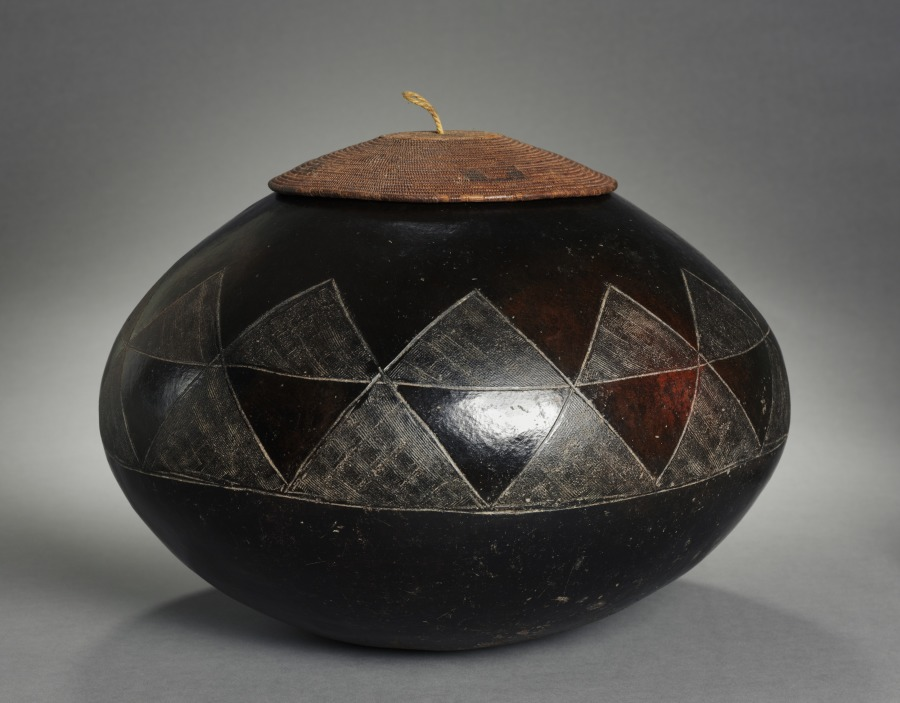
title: Lidded Pot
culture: Southern Africa, South Africa, Zulu, mid-20th century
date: 1900s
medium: Terracotta and plant fiber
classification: Vessels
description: This large, beautifully shaped vessel was used for the serving of beer, an essential component of Zulu hospitality. Undecorated vessels were for private household use, and ornamented examples were reserved for guests. Zulu pottery is produced by women, and is typically thin-walled, with a burnished black surface. Decoration may be incised around the shoulder, as in this example, or may consist of raised bumps that resemble body scarification. The basketry lid protects the vessel's contents from flies or debris; contemporary pot lids are often woven of telephone wire with a colorful plastic coating